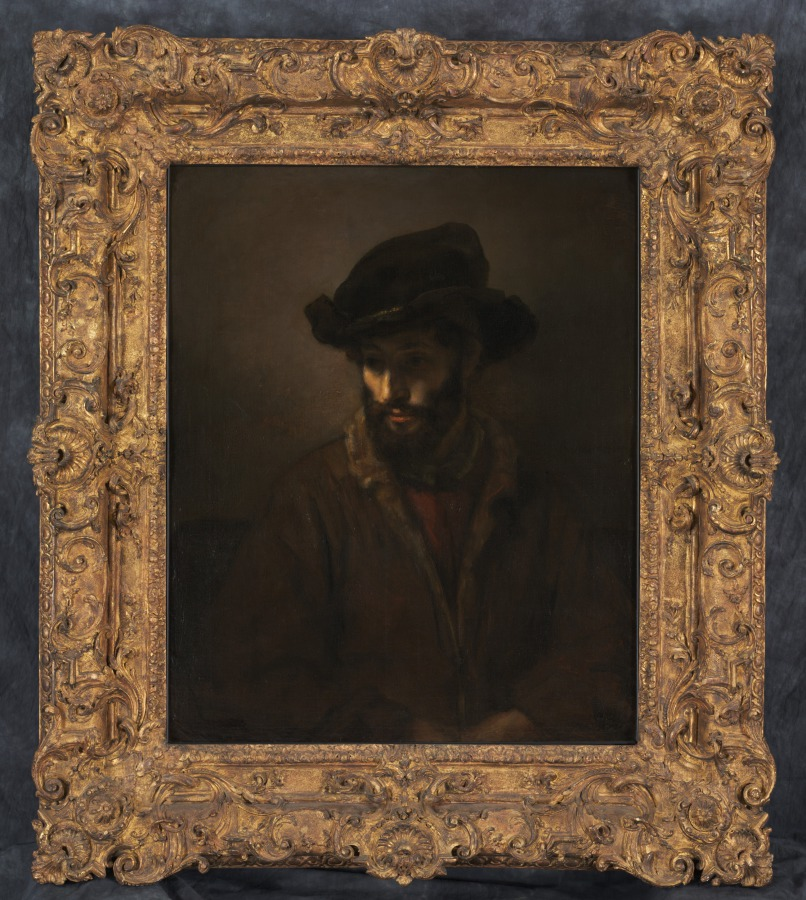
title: A Bearded Man Wearing a Hat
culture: Netherlands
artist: studio of Rembrandt van Rijn (Dutch, 1606–1669)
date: c. 1655–60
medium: oil on canvas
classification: Painting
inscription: Signed above shoulder at right: "Rembrandt 16[?]"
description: Amsterdam of the early 1600s was a religiously tolerant city, attracting many Jewish settlers of both Sephardic (Spanish and Portuguese) origin and Ashkenazic (Eastern European) descent. Rembrandt lived among both denominations and found inspiration in the manner and dress of the Ashkenazim, who maintained traditional comportment and attire and were less affluent than their Sephardim counterparts. As a result, many of the unidentified portraits from Rembrandt's late period once carried Jewish associations, but because of a lack of sufficient evidence, those assignations have since been reconsidered. Such is the case with Portrait of a Man, which was once considered a portrait of the Dutch Jewish philosopher Baruch Spinoza (1632–1677) as well as a representation of a Jewish student. Rembrandt's authorship of the painting has also undergone reassessment. The broad and thinly painted cloak and hat suggests the painting is likely a workshop product and while it does display Rembrandt's characteristic interest in a sitter's introspection, the figure's thoughtfulness remains comparatively superficial.